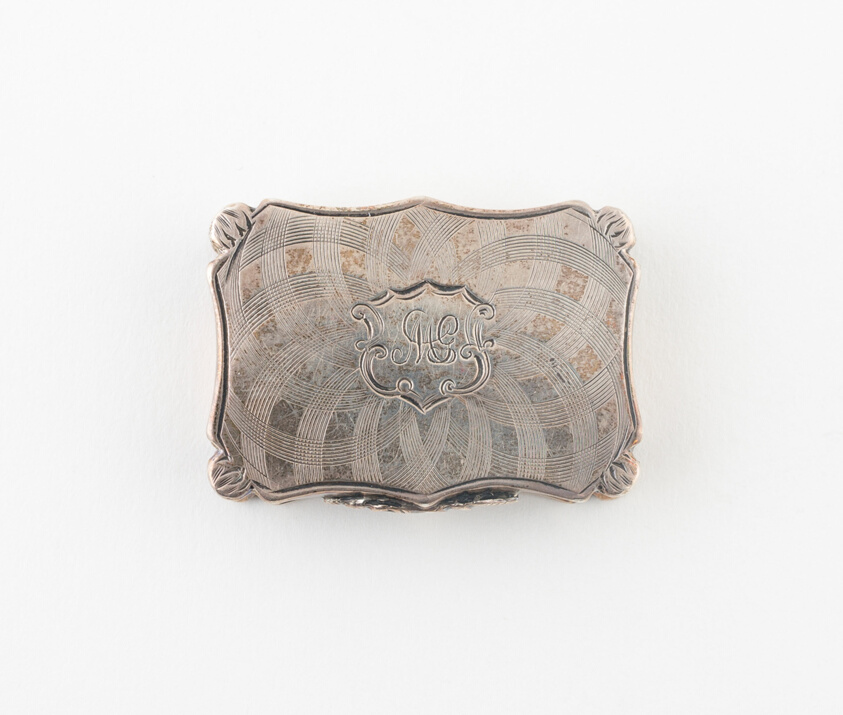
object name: Metalwork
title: Vinaigrette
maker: Nathaniel Mills; Birmingham, England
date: c. 1845/55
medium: Silver and silver gilt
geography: Birmingham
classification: container for personal use; vinaigrette (container for health care); european decorative arts; metalwork; silver; decorative object/ornament